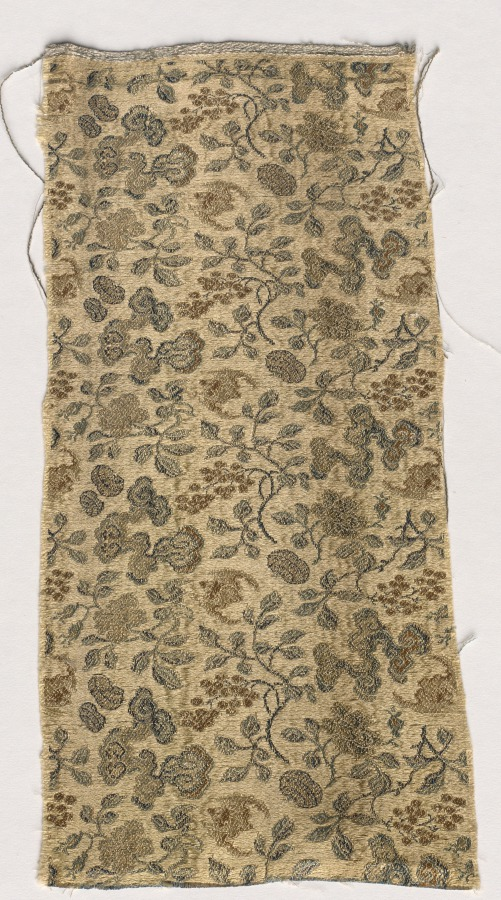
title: Fragment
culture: China, 18th century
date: 1700s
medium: satin ground; silk diasper weave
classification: Textile